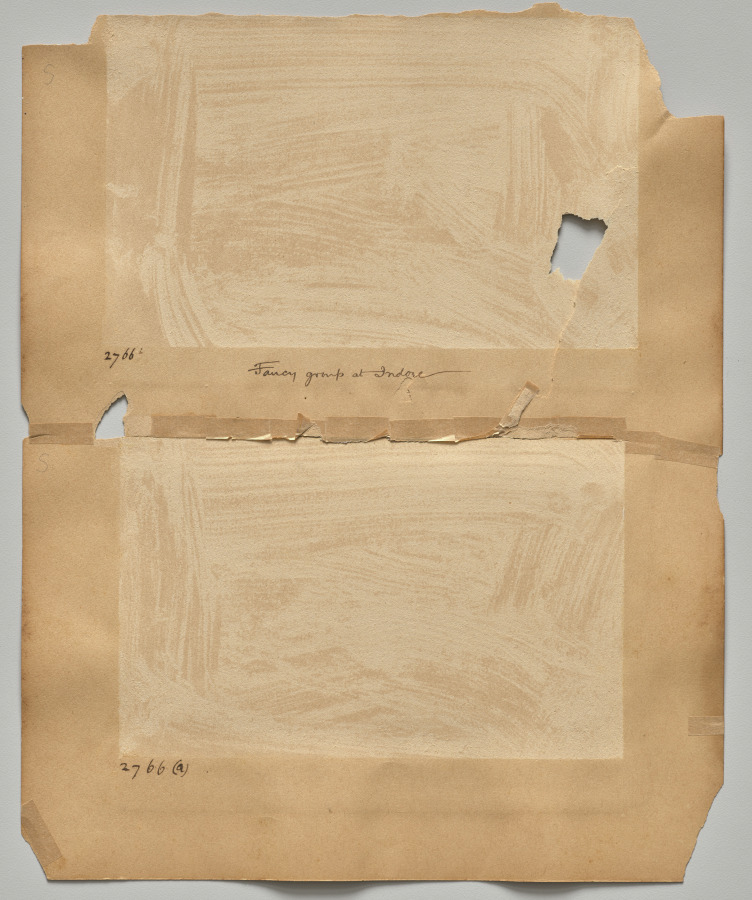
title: Servants of His Honor the Gov. of Punjab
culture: India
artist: Raja Deen Dayal (Indian, 1844–1905)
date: c. 1882–87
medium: albumen print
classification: Photograph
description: These photographs are part of an album, now disassembled, of around 105 photographs taken in India between 1885 and summer 1887 that provide glimpses into the lives of the British colonial elite and royal and upper-class Indians. The museum holds another group of 37 pictures from this album (2016.266), which was probably commissioned by a British civil servant visiting or working in India around 1888 as a personal souvenir of his experiences there.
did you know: Raja Deen Dayal is regarded now, and was considered during his lifetime, to be India’s most important 19th-century photographer.